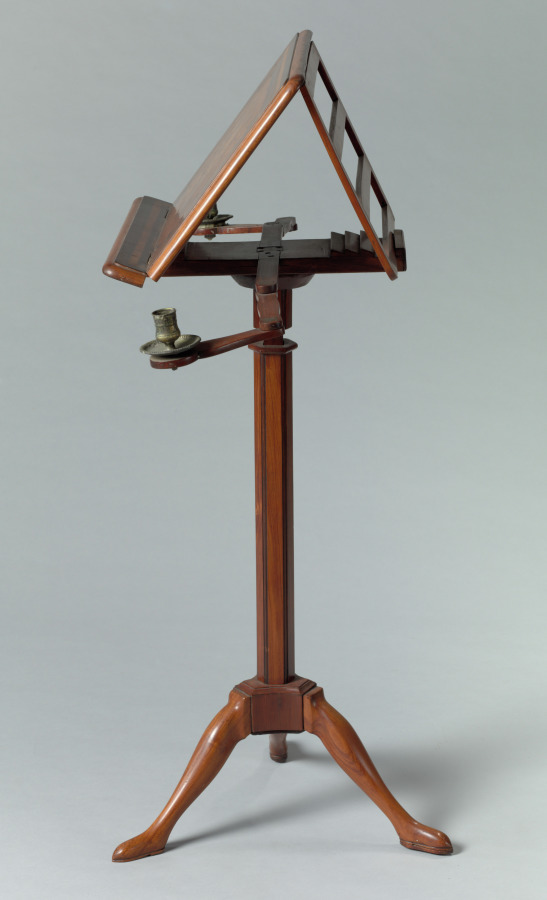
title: Music Stand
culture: France, style of Louis XVI, 18th Century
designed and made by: Canabas (French, 1715–1797)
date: c. 1775–1790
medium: satinwood veneer, with marquetry panel of various woods and metal candle holders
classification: Furniture and woodwork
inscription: signed: Canabas